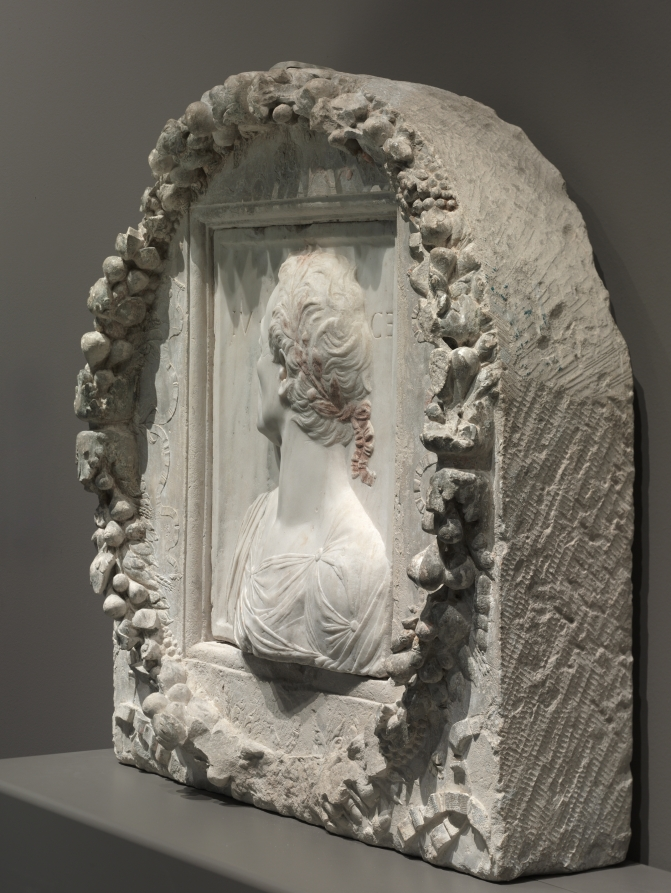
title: Julius Caesar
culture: Italy, Florence, 15th century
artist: Mino da Fiesole (Italian, c. 1430–1484)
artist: garland by Mino da Fiesole and Workshop (Italian, c. 1430–1484)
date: c. 1455–60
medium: marble with traces of bole (red clay) and limestone with traces of paint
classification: Sculpture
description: Renowned Roman general and statesman Julius Caesar (100–44 BCE) appears here as a political rather than military leader, worn by the burdens of office, with carefully described signs of aging. Mino probably used ancient coins from the collection of the Medici, Florence's ruling family, as his starting point for this sculpture. However, the complex carving, the clinging drapery, and the psychological intensity all characterize the inventiveness Renaissance artists brought to classical subject matter. In this case, Caesar offered an important model for leadership, masculinity, and composure. The garland is clearly by a different hand, but passages, such as the ribbons and flowers in low relief, correspond to details found in other decorative carvings from Mino's workshop. Initially, the limestone setting was probably put into a wall, perhaps in a lunette over the door, from which it was later removed. However, the relationship between the garland and the relief has not yet been clarified and is the subject of ongoing research.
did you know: Traces of paint on this white marble relief indicated that it was once brightly painted.